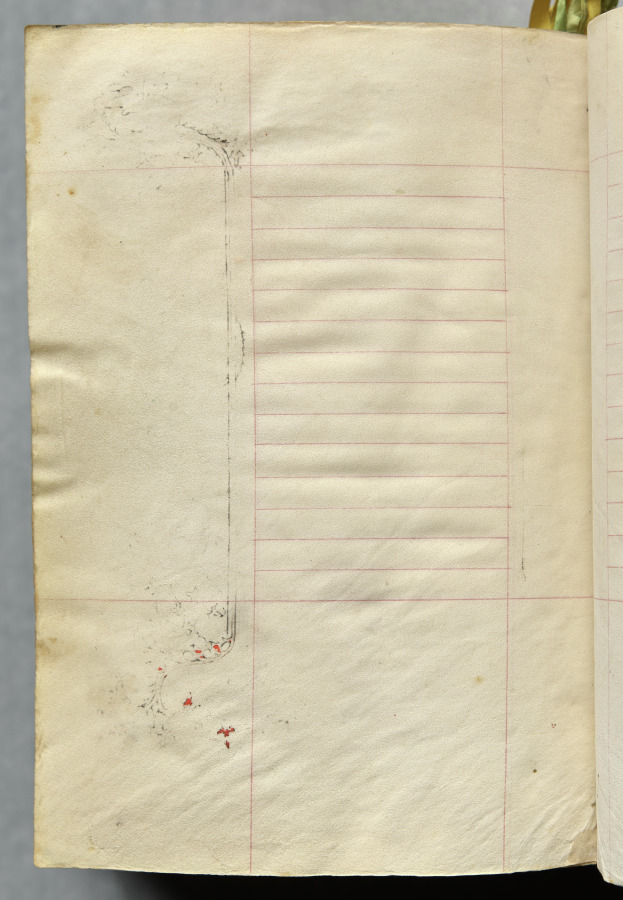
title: Hours of Charles the Noble, King of Navarre (1361-1425), fol. 327v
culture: France, Paris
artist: Master of the Brussels Initials and Associates (French)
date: c. 1405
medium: ink, tempera, and gold on vellum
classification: Bound Volume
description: This precious volume was obviously highly prized by its owner, the French-born King of Navarre, who had his coat of arms painted on no less than twenty folios. Rather than directly commissioning this manuscript from a specific workshop, it seems that Charles the Noble acquired his book of hours -- perhaps ready-made for the luxury market -- while on a trip to Paris in 1404-05. A collaborative effort, six painting styles are evidenced within the pages of this codex, those of two Italians, two Frenchmen, and two Netherlanders. The painter who was responsible for the planning and decoration of the book, and who produced seventeen of the large miniatures, was a Bolognese artist known as the Master of the Brussels Initials. His principal assistant, responsible for most of the borders, was a Florentine who signed his name "Zecho" da Firenze on folio 208 verso.